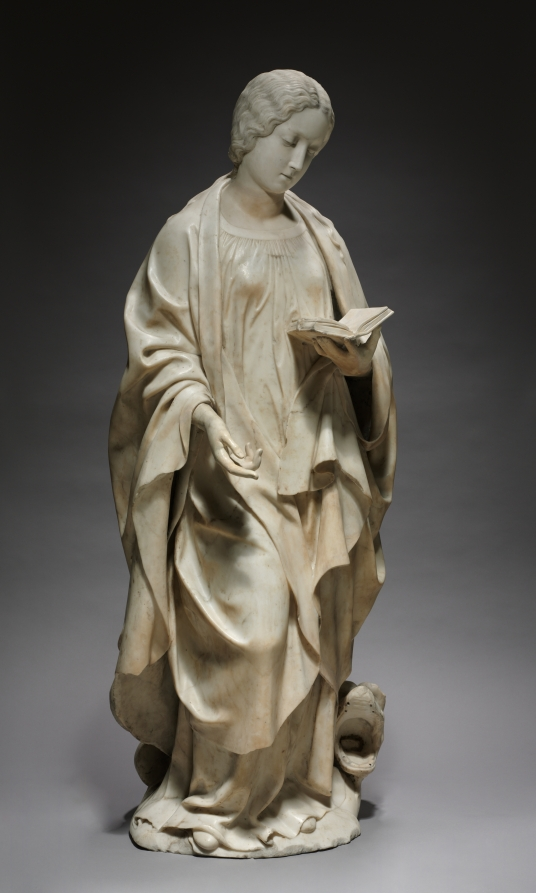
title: Saint Margaret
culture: Italy, Sicily, Palermo, 16th century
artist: Antonello Gaggini (Italian, 1478–1536)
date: c. 1520–1530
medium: marble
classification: Sculpture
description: Gaggini was a member of a large family of sculptors whose Palermo workshop supplied monumental religious sculptures for the cathedrals of Palermo and Messina in Sicily and Montelione in Calabria. After 1507 Antonello himself worked for 15 years to produce marble sculptures for Palermo Cathedral. This figure of the legendary virgin martyr, Saint Margaret, was probably commissioned for one of these ecclesiastical foundations, possibly the chancel of Palermo Cathedral. The saint is shown reading from a book of hours (a sign of her piety) and trampling upon a dragon, the symbol of Satan. The dragon became the attribute by which she is recognized in sacred art.